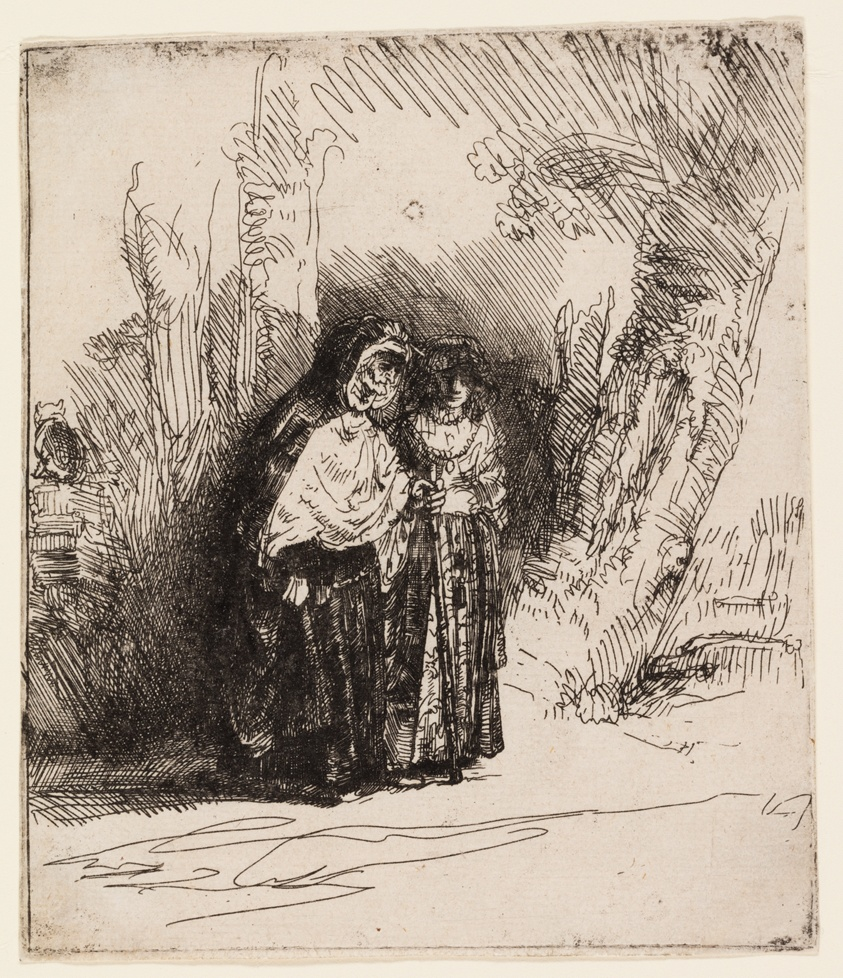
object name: Print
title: The Spanish Gypsy 'Preciosa'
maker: Rembrandt van Rijn (Dutch, 1606-1669)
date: c. 1642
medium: Etching on off-white laid paper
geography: Holland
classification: etching; print; prints and drawing; paper